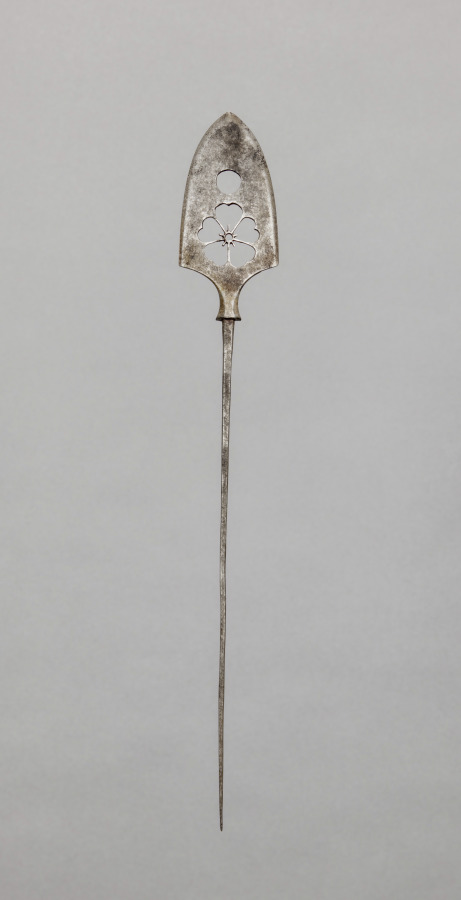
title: Arrow Point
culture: Japan, Edo period (1615–1868)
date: 1700s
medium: steel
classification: Arms and Armor